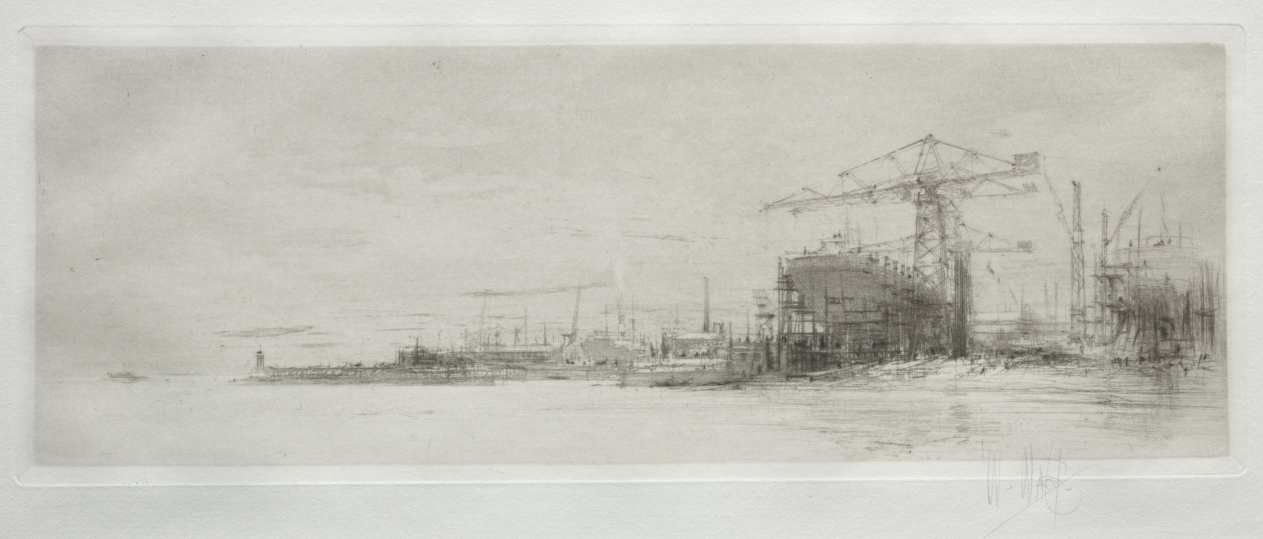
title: Arteries of Great Britain: The Clyde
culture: England, 20th century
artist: William Walcot (British, 1874–1943)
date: 1922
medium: drypoint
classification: Print